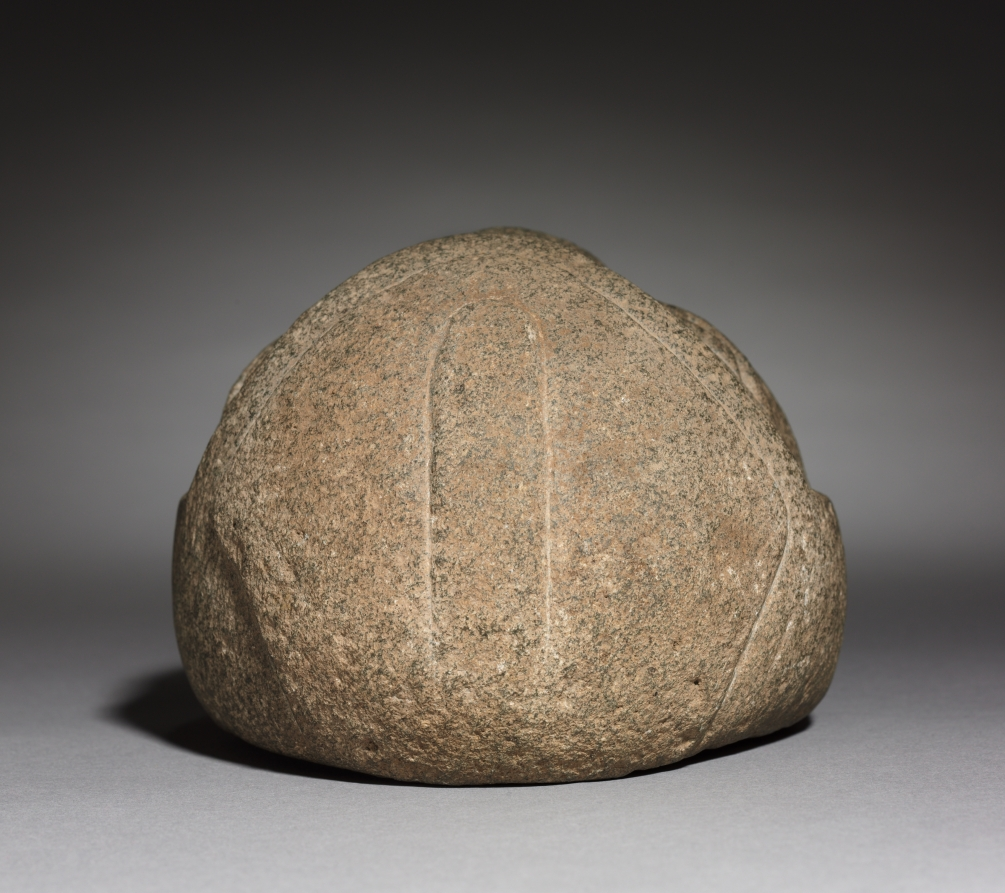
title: Head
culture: Mesoamerica, Mexico, Olmec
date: 1200–300 BCE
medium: stone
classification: Sculpture